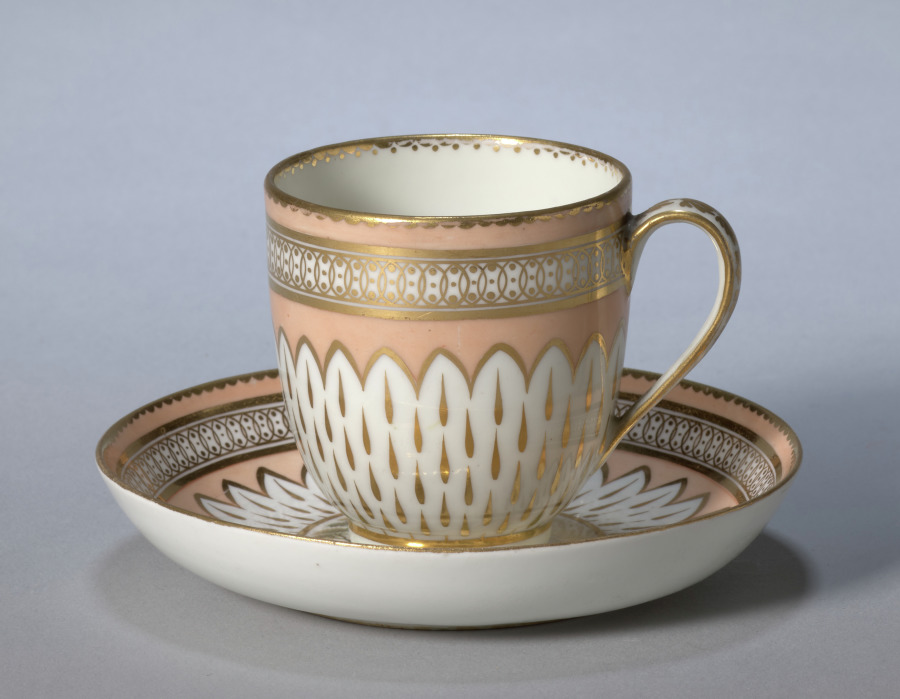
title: Cup and Saucer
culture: England, Derby, early 19th century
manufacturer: Derby (Crown Derby Period) (British)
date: c. 1800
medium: porcelain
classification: Ceramic